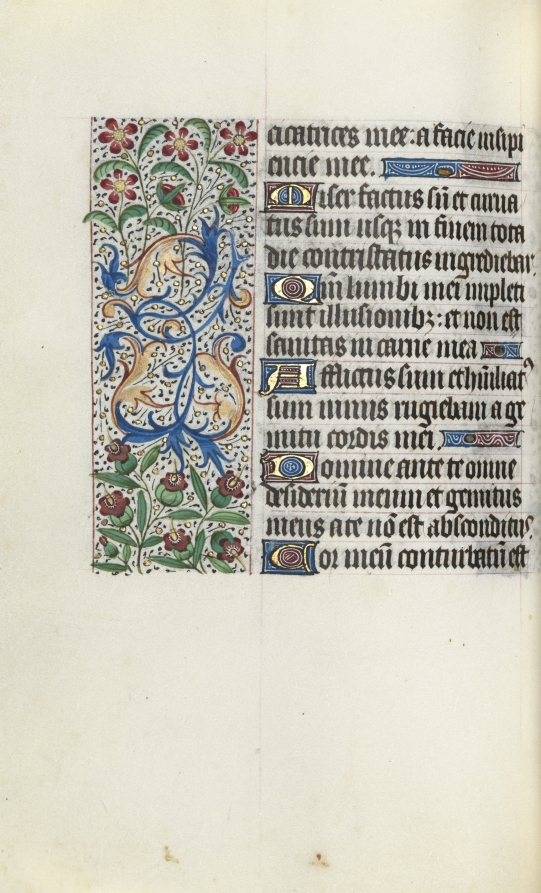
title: Book of Hours (Use of Rouen): fol. 83v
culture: France, Rouen, 15th century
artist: Master of the Geneva Latini (French, active Rouen, 1460–80)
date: c. 1470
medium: ink, tempera, and gold on vellum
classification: Bound Volume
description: In the late 1400s and early 1500s Rouen was an established and important center of book production. The city’s cathedral had a wealthy chapter that spent large sums of money to commission books and to maintain its extensive library. The stationers and booksellers would have likely been concentrated in or near the cathedral precinct. This artist, named after a manuscript now in Geneva, was Rouen’s principal illuminator during the second half of the 1400s.